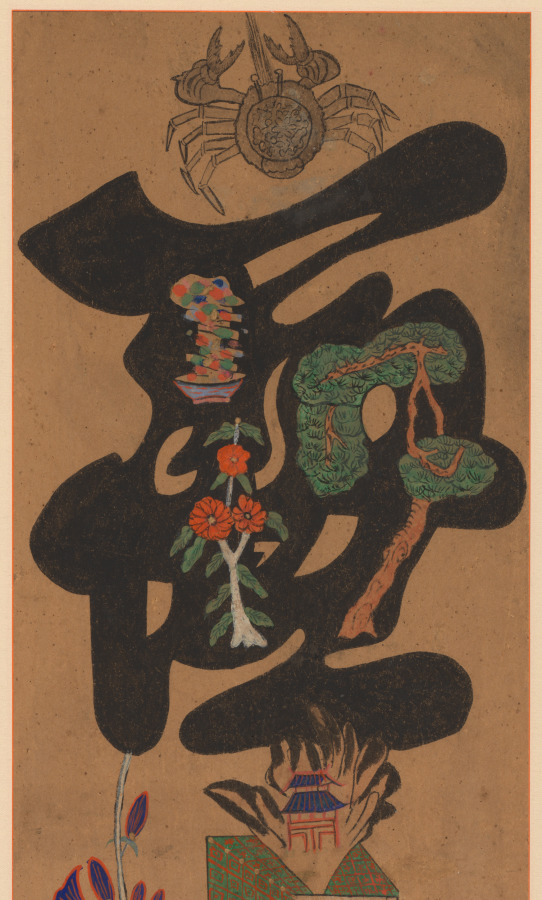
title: Munja-Chaekgeori Screen (Character-Books Screen)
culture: Korea, Joseon dynasty (1392–1910)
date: early 1900s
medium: Eight-panel folding screen, ink on paper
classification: Painting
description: This folding screen is a whimsical harmony of two different subjects: chaekgeori, or books and things; and munja, or characters. The lower section of each panel depicts the imagery of things, including books, decorative arts, and utilitarian objects. The upper portion of each panel bears a classical Chinese character. Read from far right to left, the eight characters refer to the values of Confucian teachings of the Joseon dynasty: filial piety, brotherly love, loyalty, trust, propriety, righteousness, modesty, and humility. While these two pictorial genres are harmoniously conjoined on the same picture plane, two sharply contrasting world views—urban consumerism and traditional Confucian ethics that despise materialism—compete with one another.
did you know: The eight Korean characters each mean filial piety, brotherly love, loyalty, trust, propriety, righteousness or justice, modesty or integrity, and humility or the feeling of shame.